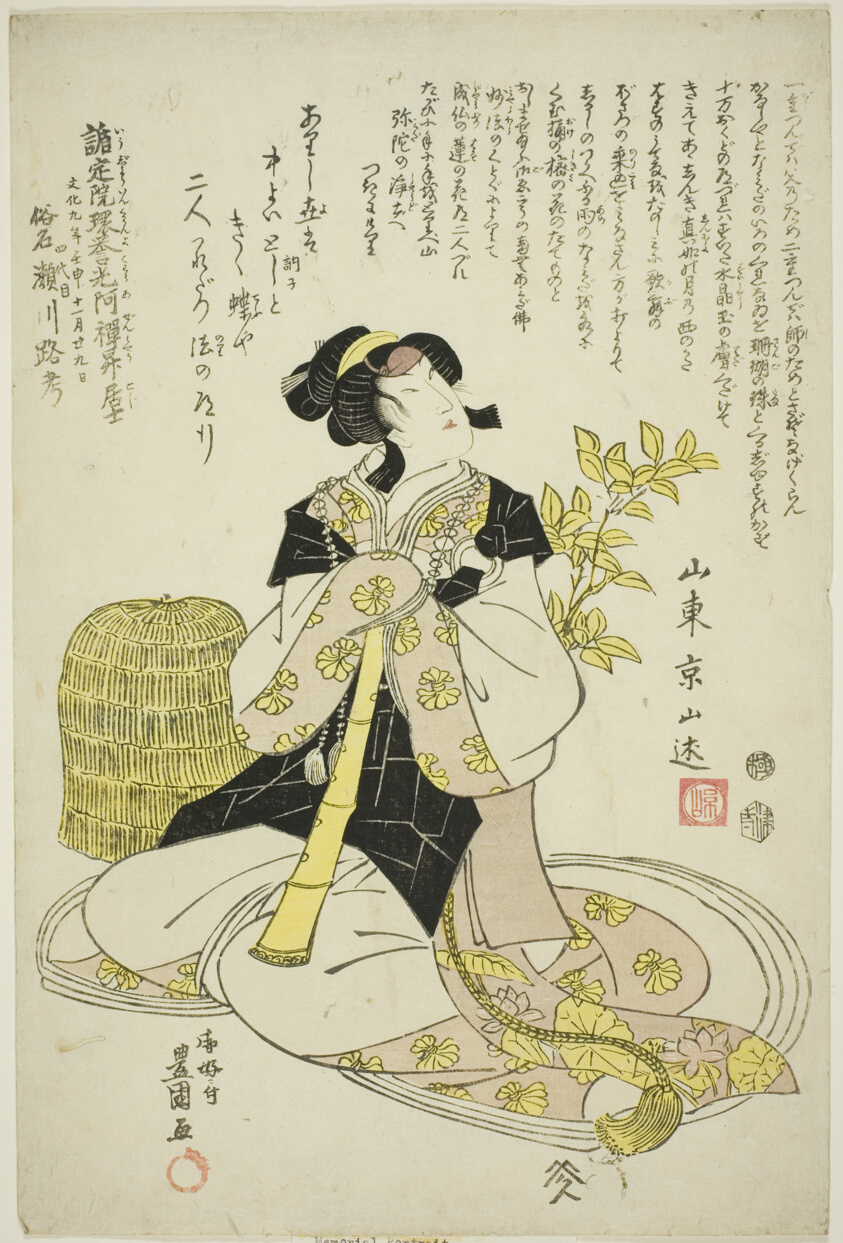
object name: Print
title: Memorial Portrait of the Actor Segawa Roko IV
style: Japanese (culture or style)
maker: Utagawa Toyokuni I 初代 歌川 豊国; Japanese, 1769–1825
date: 1812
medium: Color woodblock print; oban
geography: Japan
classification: print; asian art